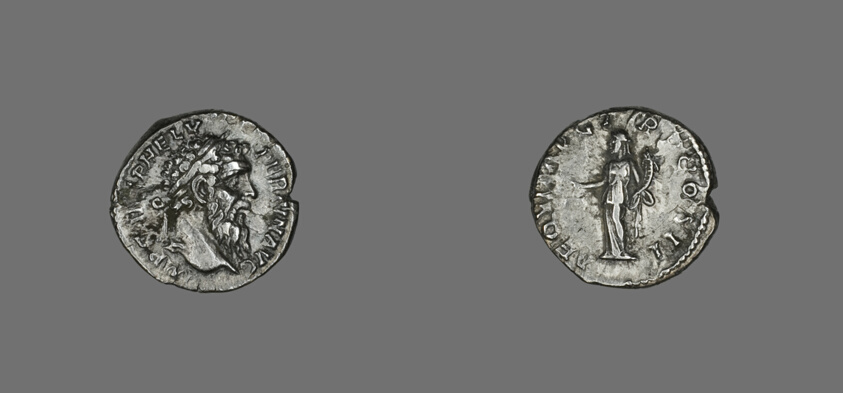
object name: Coin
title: Denarius (Coin) Portraying Emperor Pertinax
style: imperial (roman), roman (ancient, style or period)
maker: Roman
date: 193 (1 January-28 March)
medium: Silver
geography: Rome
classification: coin; ancient art